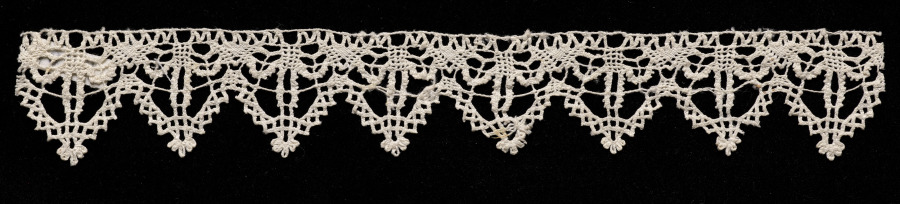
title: Lace Edging of Points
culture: Italy, Venice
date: 1540–60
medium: Bobbin lace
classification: Lace